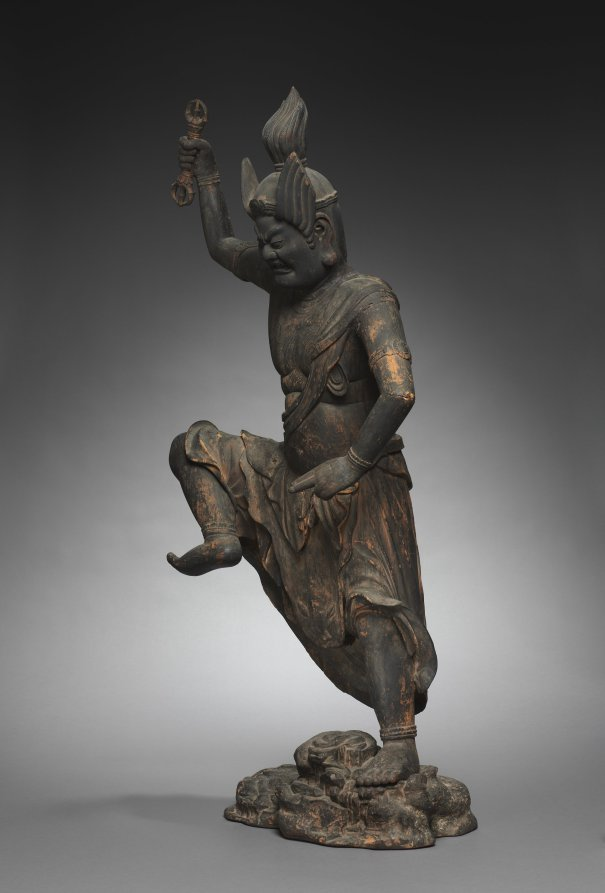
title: Zaō Gongen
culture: Japan, Kamakura period (1185–1333)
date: 1200s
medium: wood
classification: Sculpture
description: Zaō Gongen is the guardian deity of Mount Kinpu in Yoshino south of Nara. Zaō appeared at the behest of En no Gyōja, who prayed for a powerful protector of the mountain. The deity was described as a combined manifestation of the Buddha Shakyamuni, Thousand-Armed Kannon, and Miroku. These three deities were viewed as the past, present, and future protectors of the world. Zaō’s appearance derives from portrayals of fierce Buddhist deities.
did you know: Zaō Gongen wears the pelt of a large feline, the face of which is near his knee.